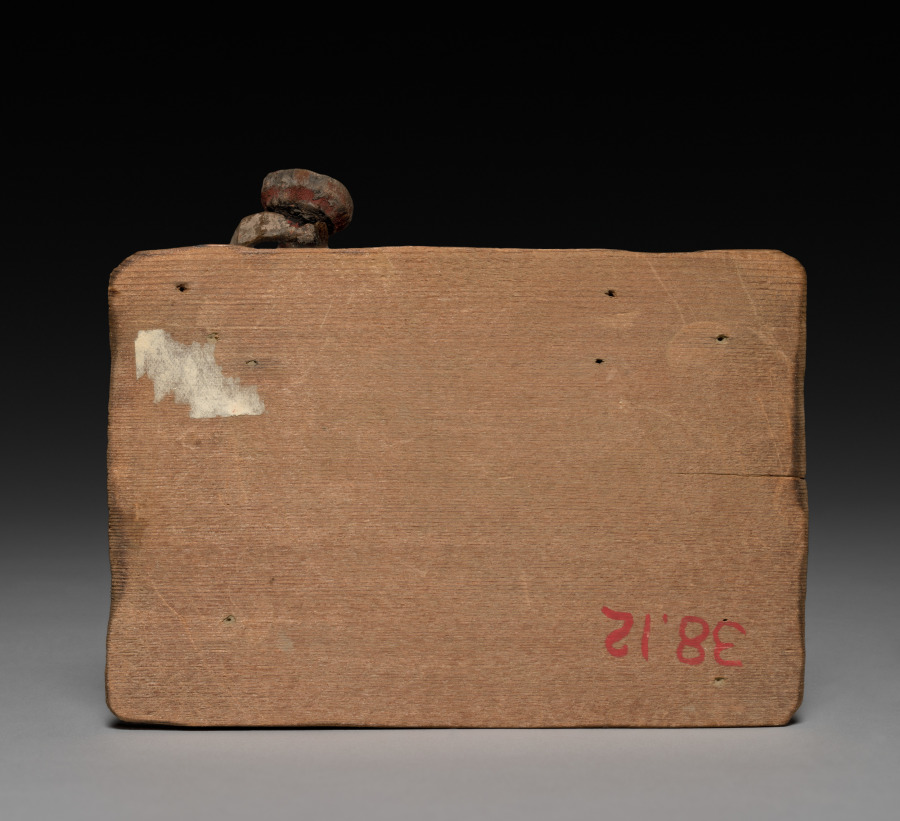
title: Figure with Sword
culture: China, Eastern Zhou dynasty (770–256 BCE), Warring States period (475–221 BCE)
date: 400–300 BCE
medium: wood with traces of polychromy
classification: Sculpture